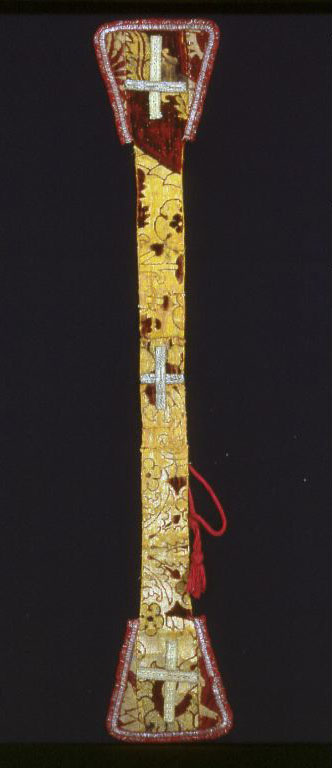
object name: Textile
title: Stole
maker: Spain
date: 15th century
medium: Silk, velvet; cut, voided; additional brocading wefts in gilt strip (wound around silk fiber core) forming loops where required; gilt galloon trim and crosses; two attached silk cords, knotted and fringed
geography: Spain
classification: textile; weaving - velvet; weaving; costume; dress (garment); clothing